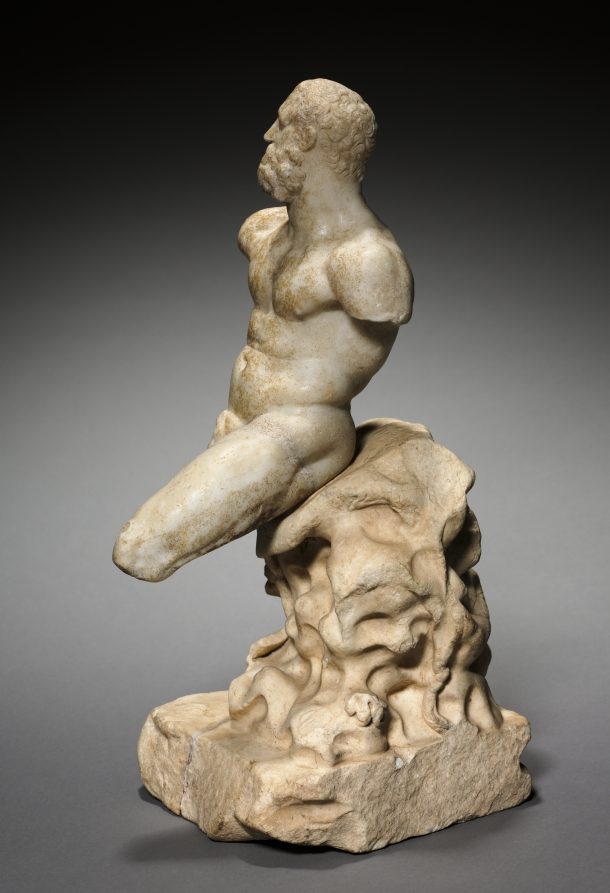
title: Herakles Epitrapezios (Hercules of the Table)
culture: Italy, Roman, Alexandrian(?)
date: 1–100 CE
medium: marble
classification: Sculpture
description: The Roman poets Martial and Statius mention a bronze statuette made by the master Greek sculptor Lysippos (active c. 360s-310s BC). It depicted the Greek hero Herakles seated on a rock with a drinking cup and was created for Alexander the Great, who claimed Herakles as an ancestor and carried the sculpture with him on his military campaigns. Later, the work was said to have been acquired by Hannibal, Sulla, and the famed Roman art collector Novius Vindex. The statuette is called epitrapezios (on the table) either because it was designed to be displayed on a tabletop or because it shows Herakles seated, as at a table. Later sculptors made many more versions, including this one, to meet the demand of Roman collectors enamored with Greek art.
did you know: The sculptor carved Herakles and his rocky seat (covered with his lionskin) from separate marble pieces.